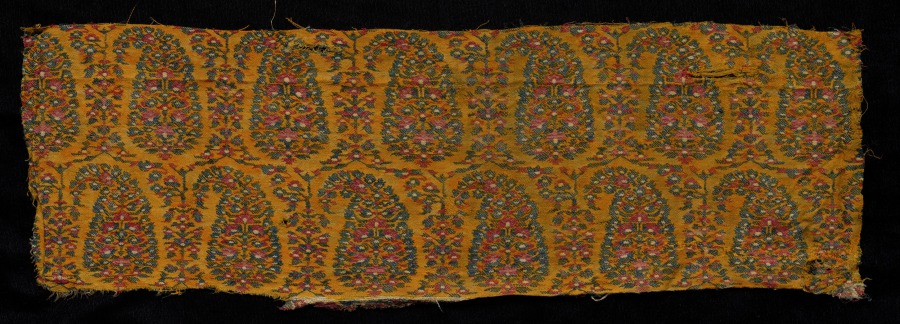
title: Fragment of a Shawl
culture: India, Kashmir, 19th century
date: 1800s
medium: tapestry weave: wool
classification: Textile